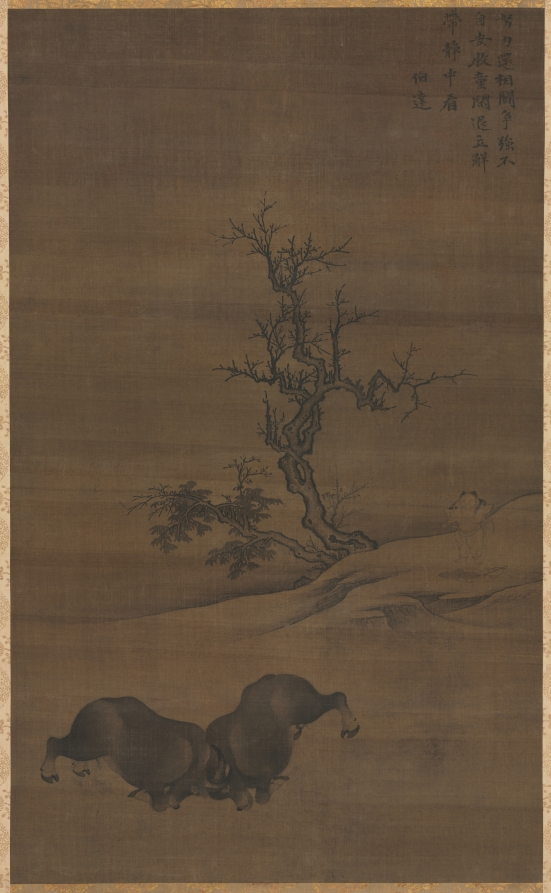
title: Herdboys and Buffalo in Landscape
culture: China, Qixian, Yuan dynasty (1271-1368)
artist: Guo Min (Chinese, mid-late 1200s)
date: 1200s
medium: Hanging scroll; ink on silk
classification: Painting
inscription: 努力還相鬪，爭強不自安。/ 牧童閑退立，解帶靜中看。/ 伯達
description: Herdboys tend their buffalo in a bucolic landscape by a winding stream. Guo Min emphasizes the massive forms and mighty power of the animals, transforming them into forces of nature. The poem on this scroll reads: "The bulls are engaging in fighting, Cautiously, each seeks to overcome the other. The herdboy calmly stands by. Untying his belt, he silently watches."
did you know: Tending water buffalos has traditionally been the task of young boys and can still be seen in rural areas of Southern China today.